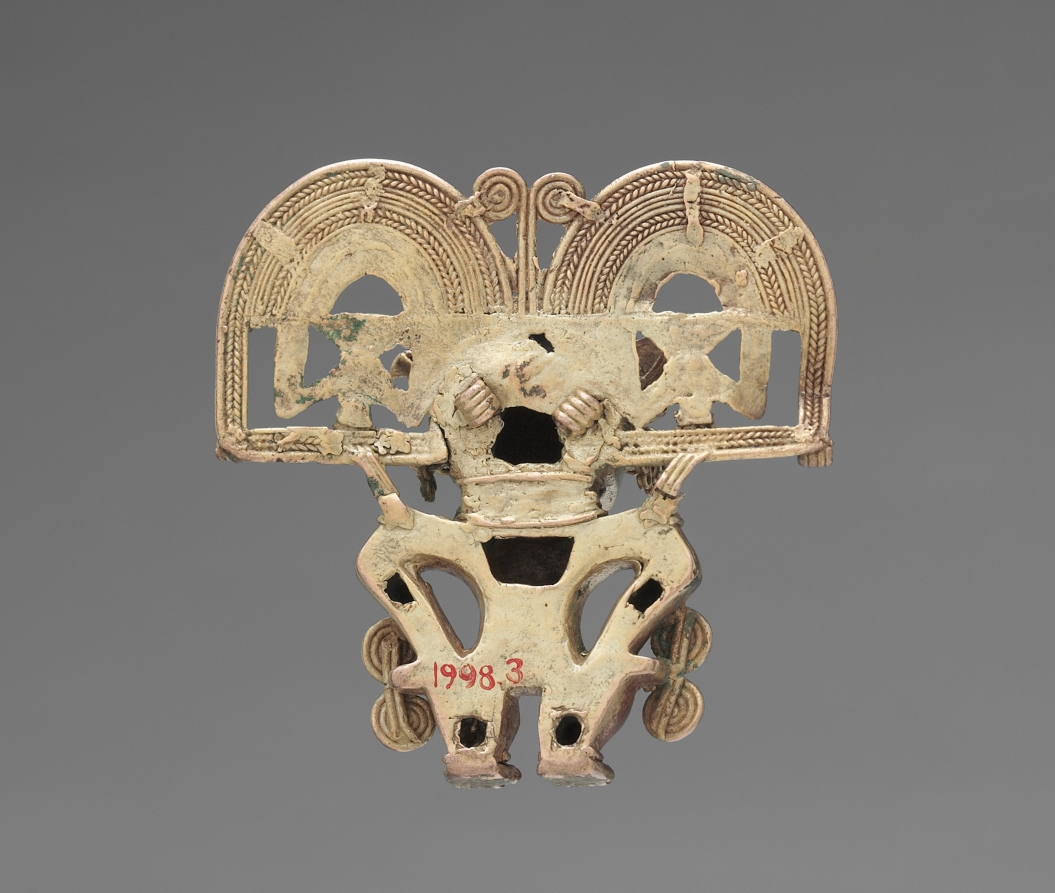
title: Figure Pendant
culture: Colombia, Tairona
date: 900–1550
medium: cast gold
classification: Metalwork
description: Tairona-style pendants are among the most spectacular of all ancient American gold ornaments, in part because of the detail achieved with lost-wax casting. The traits of the figure pendant include a lower lip ornament and a headdress in which two bats hang upside down. Although called caciques (chieftains)-that is, ruler portraits-the meaning of such figures is not well understood. Bird imagery was important in the isthmian region in ancient times and remains so today. For instance, among the modern Bribri of Costa Rica, the principal creator deity (Sibo) takes the form of a buzzard or kite who wears a collar. Collars are standard features of ancient bird pendants, like the one shown here.